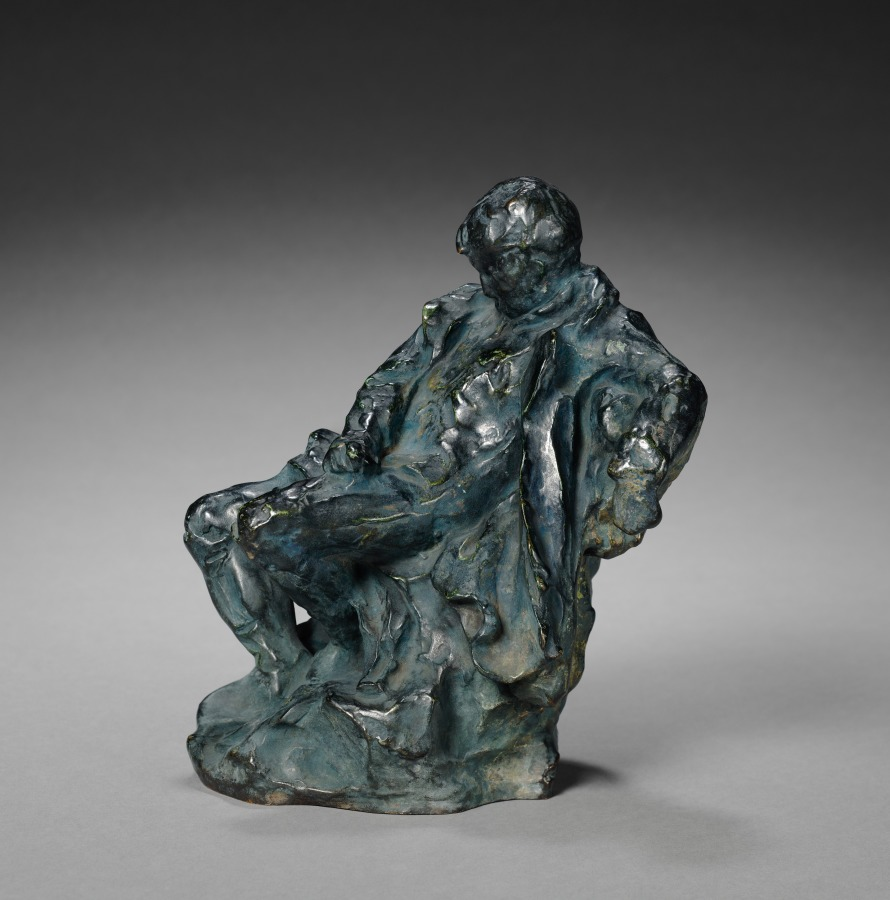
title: Napoleon on St. Helena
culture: France, 19th century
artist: Jean-Baptiste Carpeaux (French, 1827–1875)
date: c. 1860–1870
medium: bronze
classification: Sculpture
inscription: Carpeaux, probably in the wax model, left of Napoleon's foot; on back, an inscription, perhaps the foundry name, has been obliterated with tool marks.